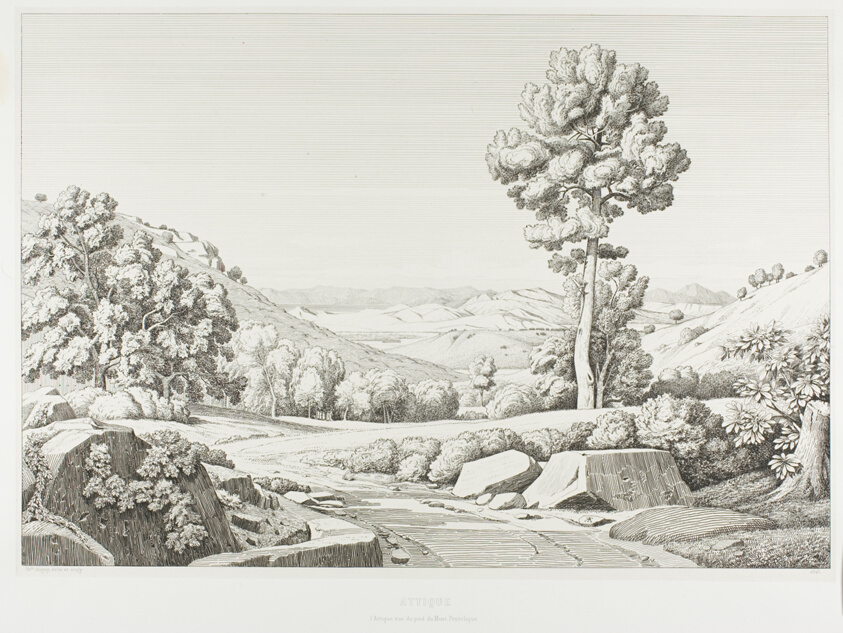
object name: Print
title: Attica Viewed from Mount Pentéli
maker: Théodore Caruelle d'Aligny; French, 1798-1871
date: 1845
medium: Etching on ivory China paper, laid down on white wove paper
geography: France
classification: etching; print; prints and drawing